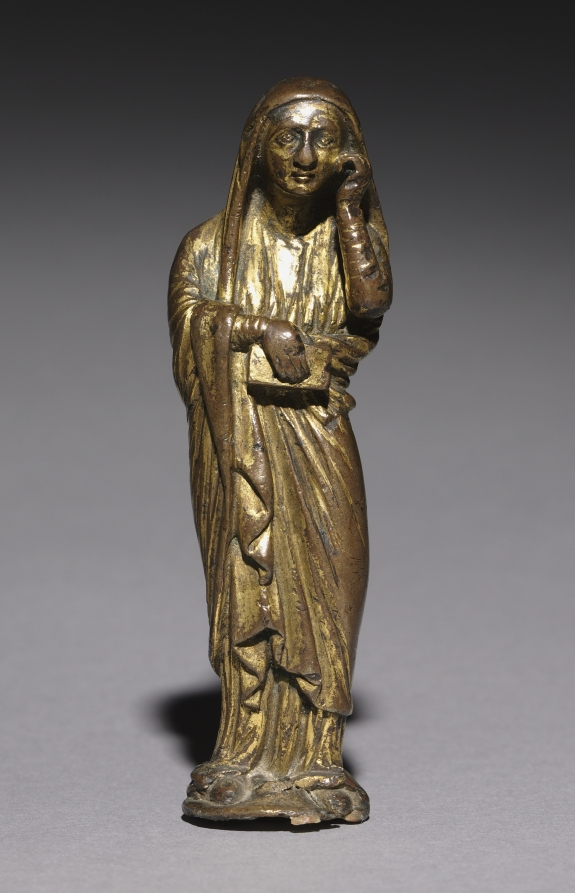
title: Mourning Mary, Probably from an Altar Cross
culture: Mosan, Valley of the Meuse, Gothic period. 13th century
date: 1200–1300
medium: gilded bronze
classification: Sculpture